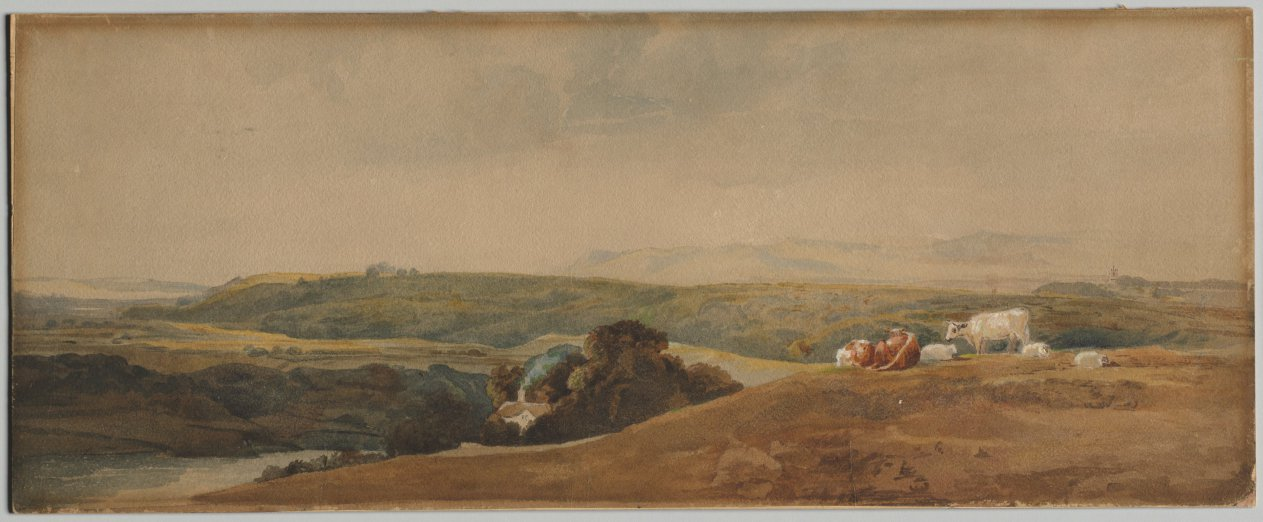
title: Mountains and Cattle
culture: England, 19th century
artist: Peter De Wint (British, 1784–1849)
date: c. 1807–49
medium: watercolor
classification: Drawing